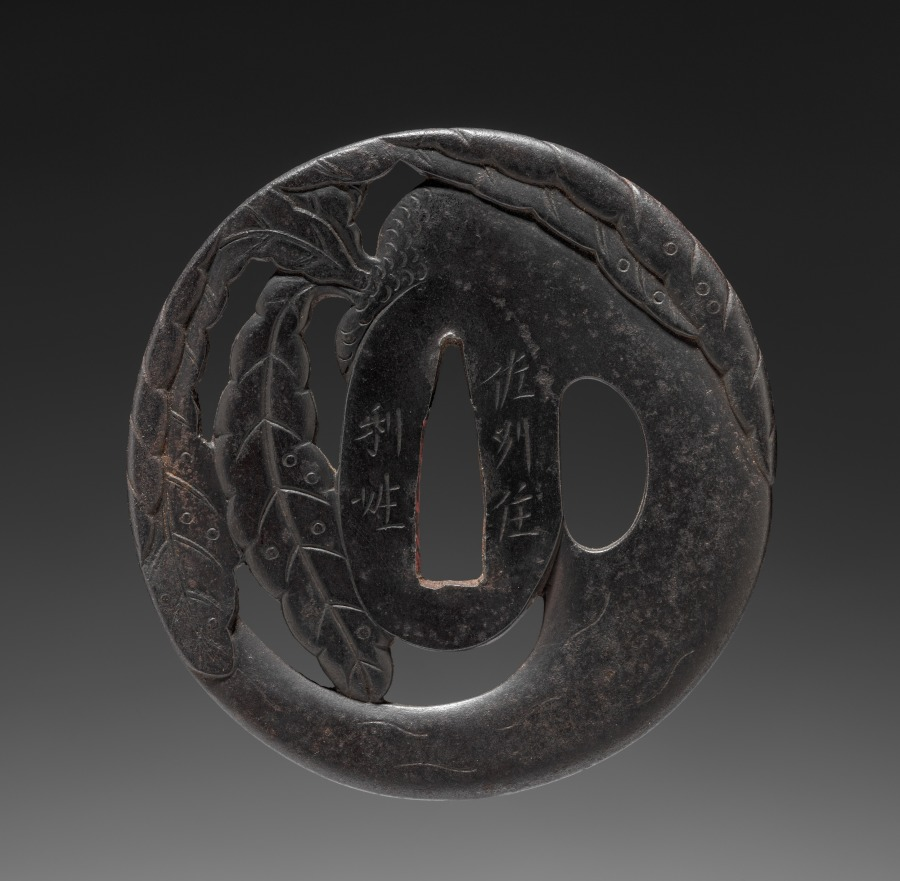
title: Sword Guard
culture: Japan, Edo period (1615–1868)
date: early 1800s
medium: iron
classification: Arms and Armor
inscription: signed "Toshiuji, residing in Tosa province."